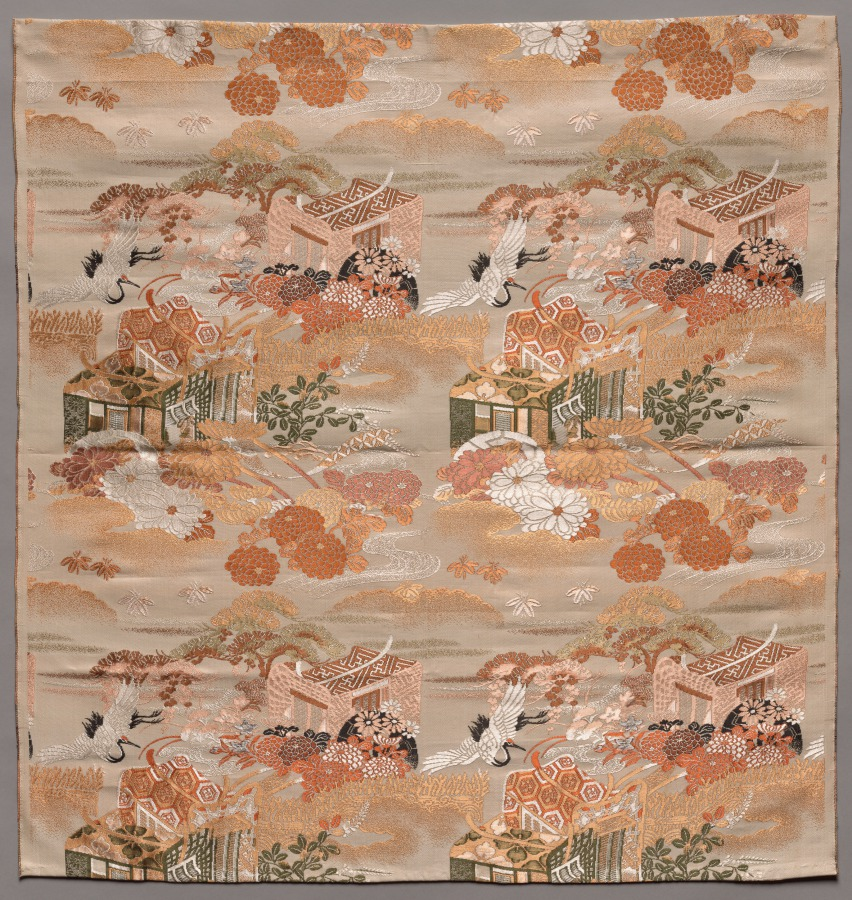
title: Length of Textile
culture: Japan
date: late 1800s–early 1900s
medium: silk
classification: Textile